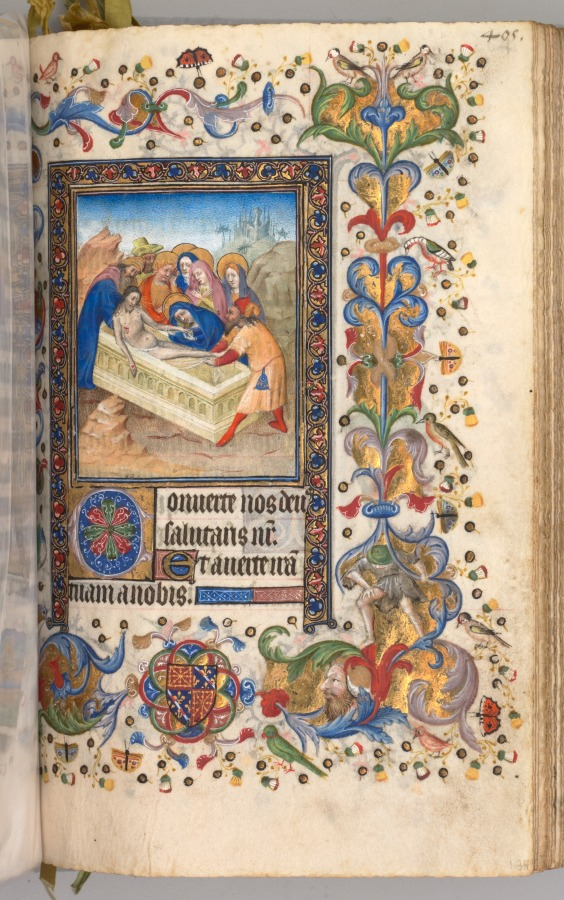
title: Hours of Charles the Noble, King of Navarre (1361-1425): fol. 197r, Entombment of Christ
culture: France, Paris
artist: Master of the Brussels Initials and Associates (French)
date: c. 1405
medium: ink, tempera, and gold on vellum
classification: Bound Volume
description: This precious volume was obviously highly prized by its owner, the French-born King of Navarre, who had his coat of arms painted on no less than twenty folios. Rather than directly commissioning this manuscript from a specific workshop, it seems that Charles the Noble acquired his book of hours -- perhaps ready-made for the luxury market -- while on a trip to Paris in 1404-05. A collaborative effort, six painting styles are evidenced within the pages of this codex, those of two Italians, two Frenchmen, and two Netherlanders. The painter who was responsible for the planning and decoration of the book, and who produced seventeen of the large miniatures, was a Bolognese artist known as the Master of the Brussels Initials. His principal assistant, responsible for most of the borders, was a Florentine who signed his name "Zecho" da Firenze on folio 208 verso.